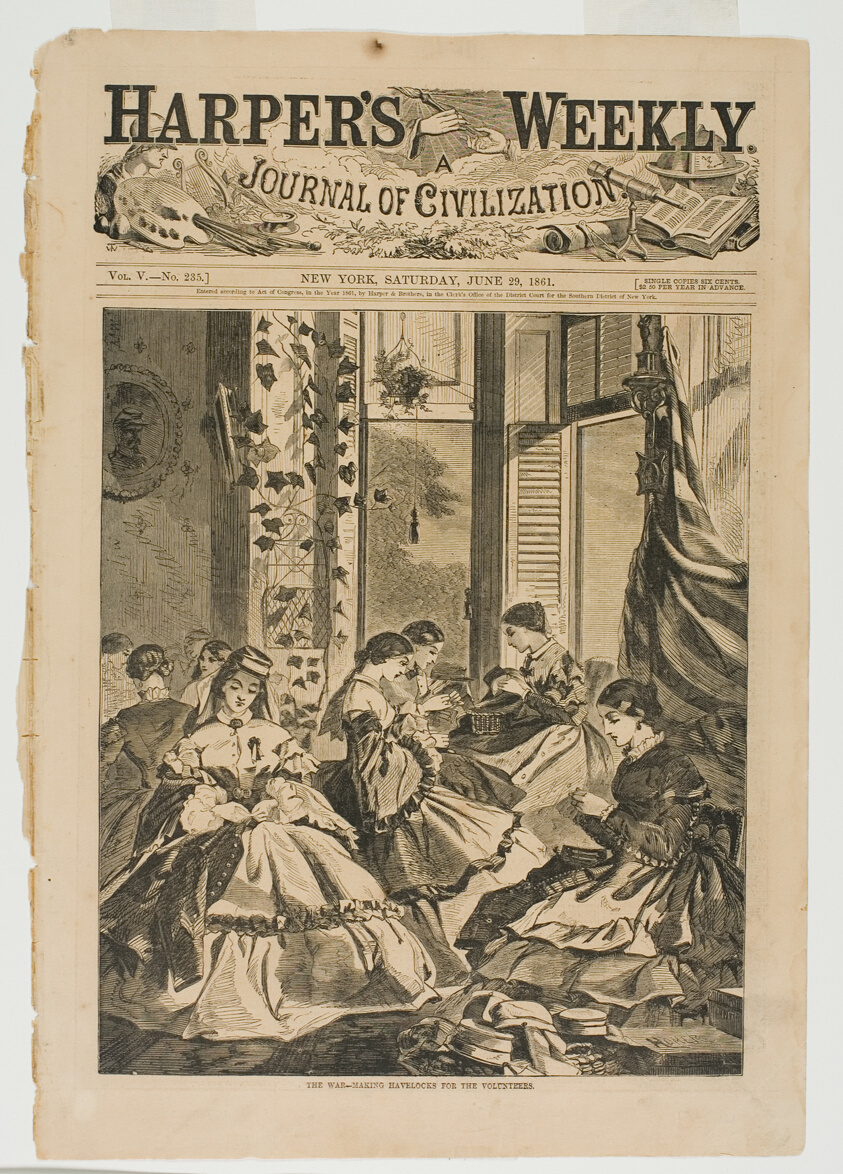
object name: Print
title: The War—Making Havelocks for the Volunteers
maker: Winslow Homer (American, 1836-1910); published by Harper's Weekly (American, 1857-1916)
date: published June 29, 1861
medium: Wood engraving on paper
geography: United States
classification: wood engraving; print; prints and drawing